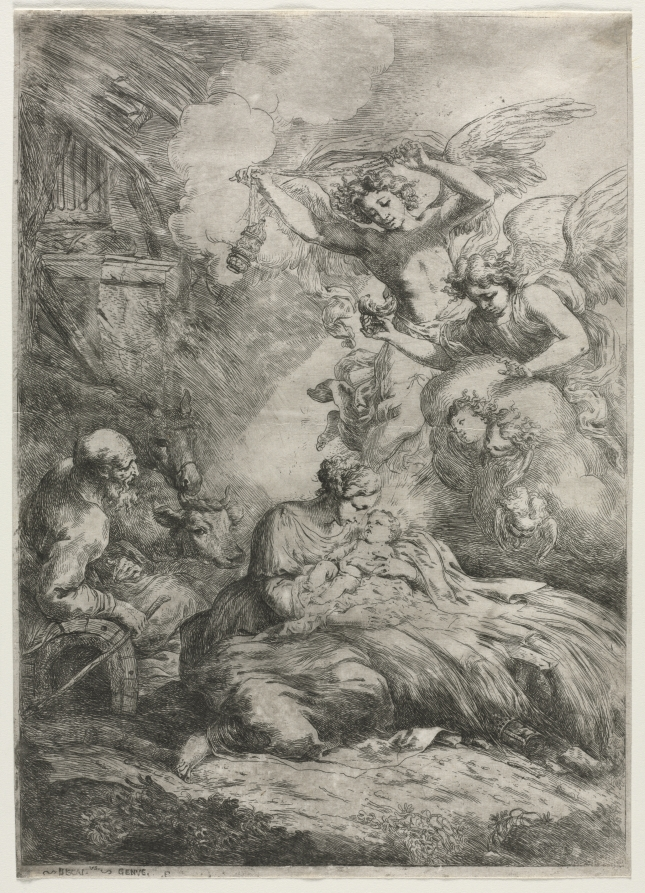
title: The Nativity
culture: Italy, 17th century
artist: Bartolomeo Biscaino (Italian, 1632–1657)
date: 1650–57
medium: etching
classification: Print